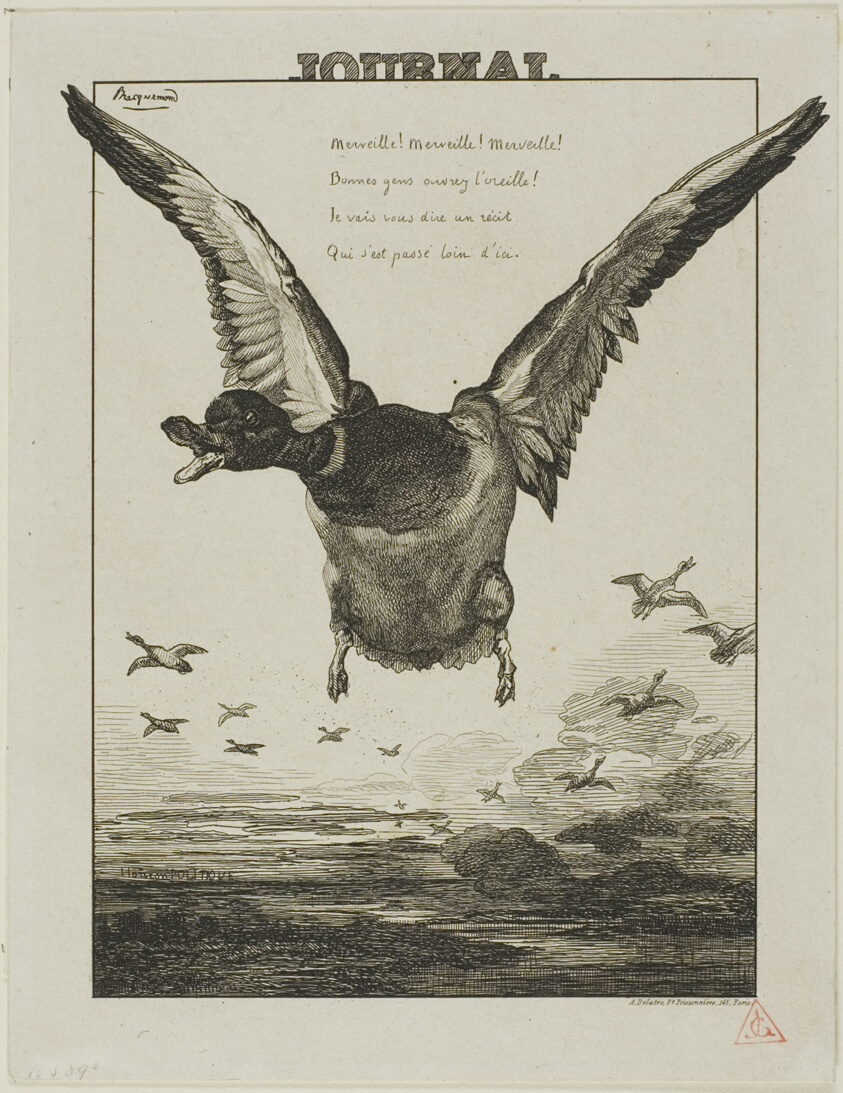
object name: Print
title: The Duck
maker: Felix Bracquemond; French, 1833–1914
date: 1856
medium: Etching on ivory wove paper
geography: France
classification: etching; print; prints and drawing